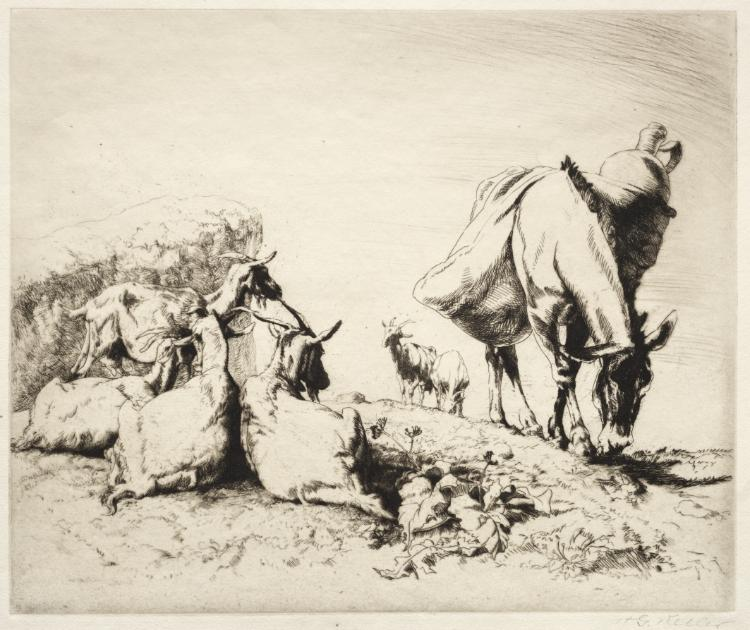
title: A Roadside in Spain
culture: America, Ohio, Cleveland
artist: Henry Keller (American, born Germany, 1869–1949)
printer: Frederick Reynolds (American, b. England, 1882–1945)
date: 1925–26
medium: etching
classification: Print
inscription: Signed in pencil on lower-right corner: H.G. Keller